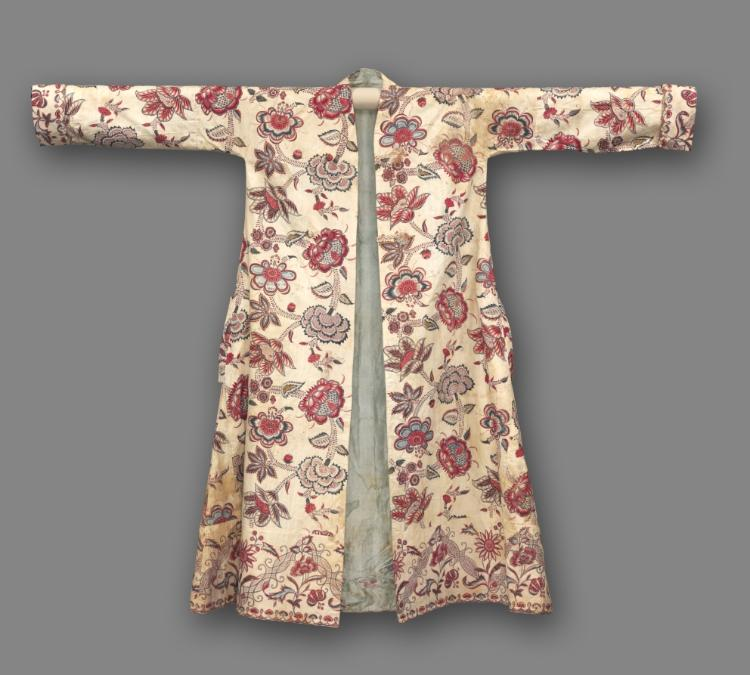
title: Man's Morning Coat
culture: India, Mughal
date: 1700–1750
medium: cotton: tabby weave, resist-dyed (mordant resist and batik); applied gold leaf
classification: Garment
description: Much of the Mughals’ wealth derived from the international export of textiles, which became increasingly fashionable throughout Europe and America during the 18th century. This garment was made in India for the aristocratic French market. The floral designs inspired by the southern Indian dyed fabrics known as palampore have been enlivened by labor-intensive gilding and burnishing.